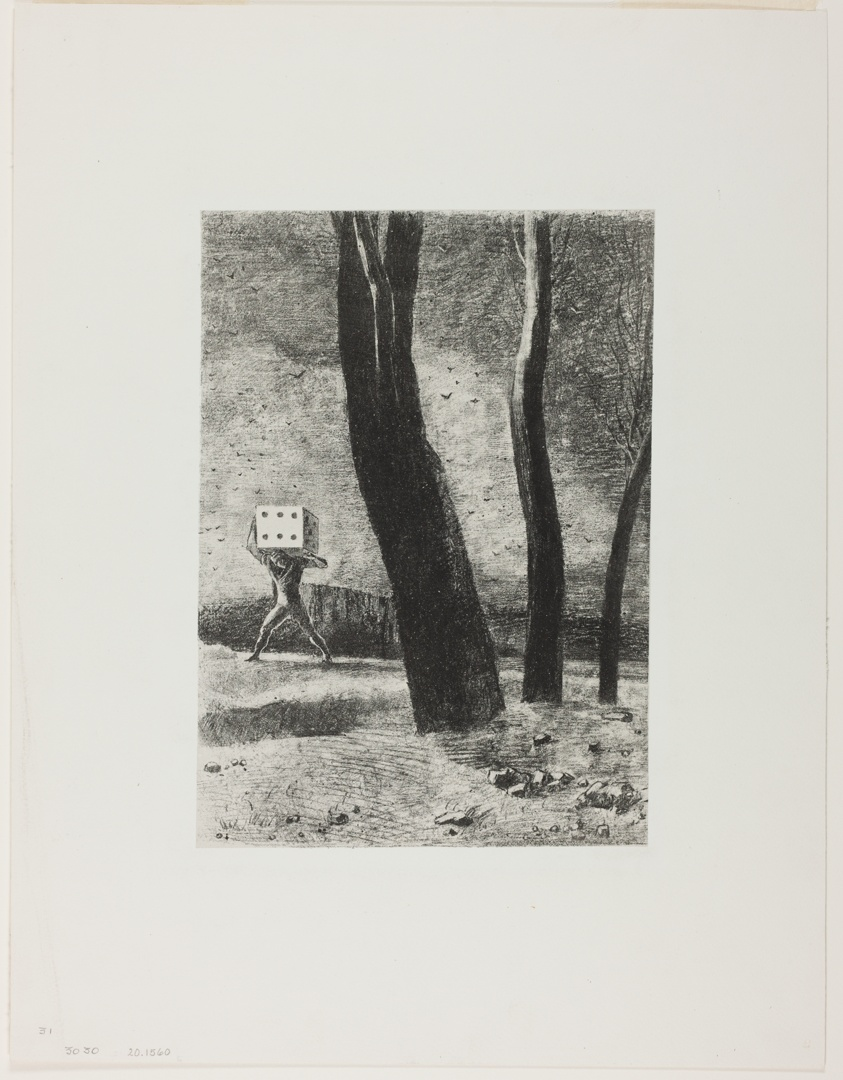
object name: Print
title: The Gambler, plate five from In Dreams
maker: Odilon Redon (French, 1840-1916)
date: 1879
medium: Lithograph on mounted ivory China paper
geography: France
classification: lithograph; print; prints and drawing; paper